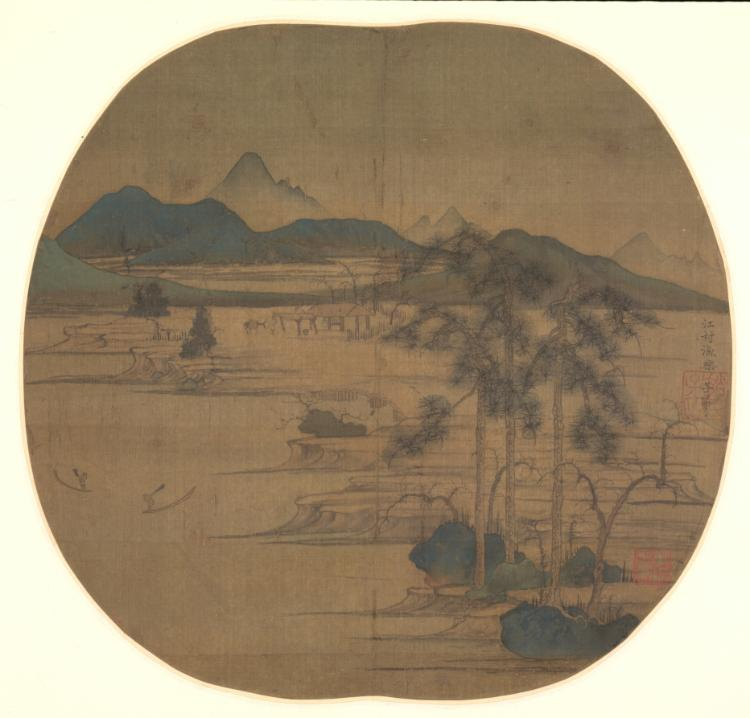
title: River Village: Fisherman's Joy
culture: China, Yuan dynasty (1271-1368)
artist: Zhao Mengfu (Chinese, 1254–1322)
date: c. 1302–3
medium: Fan painting mounted as album leaf; ink and color on silk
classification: Painting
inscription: 江村漁樂 子昂。 [印] 趙氏子昂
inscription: 1 colophon and 2 additional seals: 1 colophon, unsigned; 2 seals of C. C. Wang 王季遷 (1907–2003).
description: The artist of this blue-green–style landscape, Zhao Mengfu, was a southerner, versed in all fields of literati pursuits, such as calligraphy and connoisseurship. A princeling of the defeated Southern Song dynasty, he was nevertheless successfully recruited by Khubilai Khan to the Mongol court in the new capital, Dadu (modern Beijing), in 1286. This painting combines a distinctively southern flat watery landscape combined with features of the northern landscape tradition, notably the spiky trees, branches, and rough-surfaced rocks.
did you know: Various human elements can be found in the painting: two fishermen, an individual with a donkey, and someone in the house.